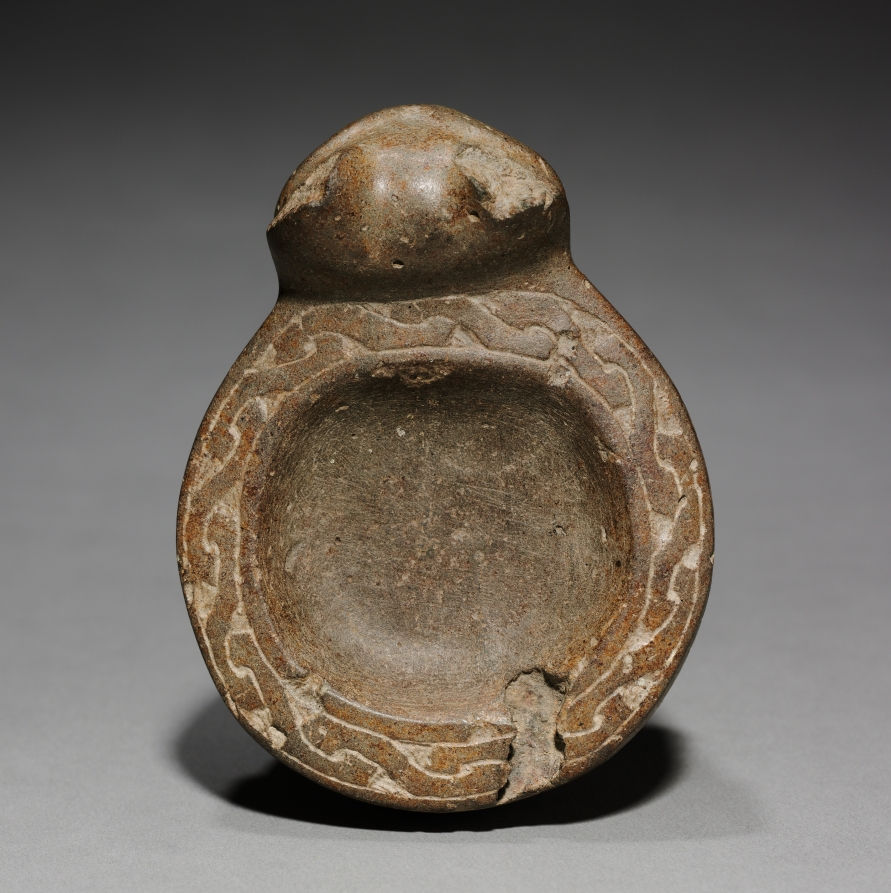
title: Feline Mortar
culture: Peru, North Highlands, Pacopampa(?), Chavín style (900-200 BCE)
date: 700–1 BCE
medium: stone, pigment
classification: Stone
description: Size suggests that this Chavín-style mortar was not used to grind bulky staples like corn, but instead pigments or plant hallucinogens used in religious rites to achieve spiritual insight and communion with cosmic forces. This may come from Pacopampa, a site in the northern highlands where elites adopted Chavín deities and worshiped them alongside local deities. These small sculptures illustrate the appeal and the spread of Chavín religion.